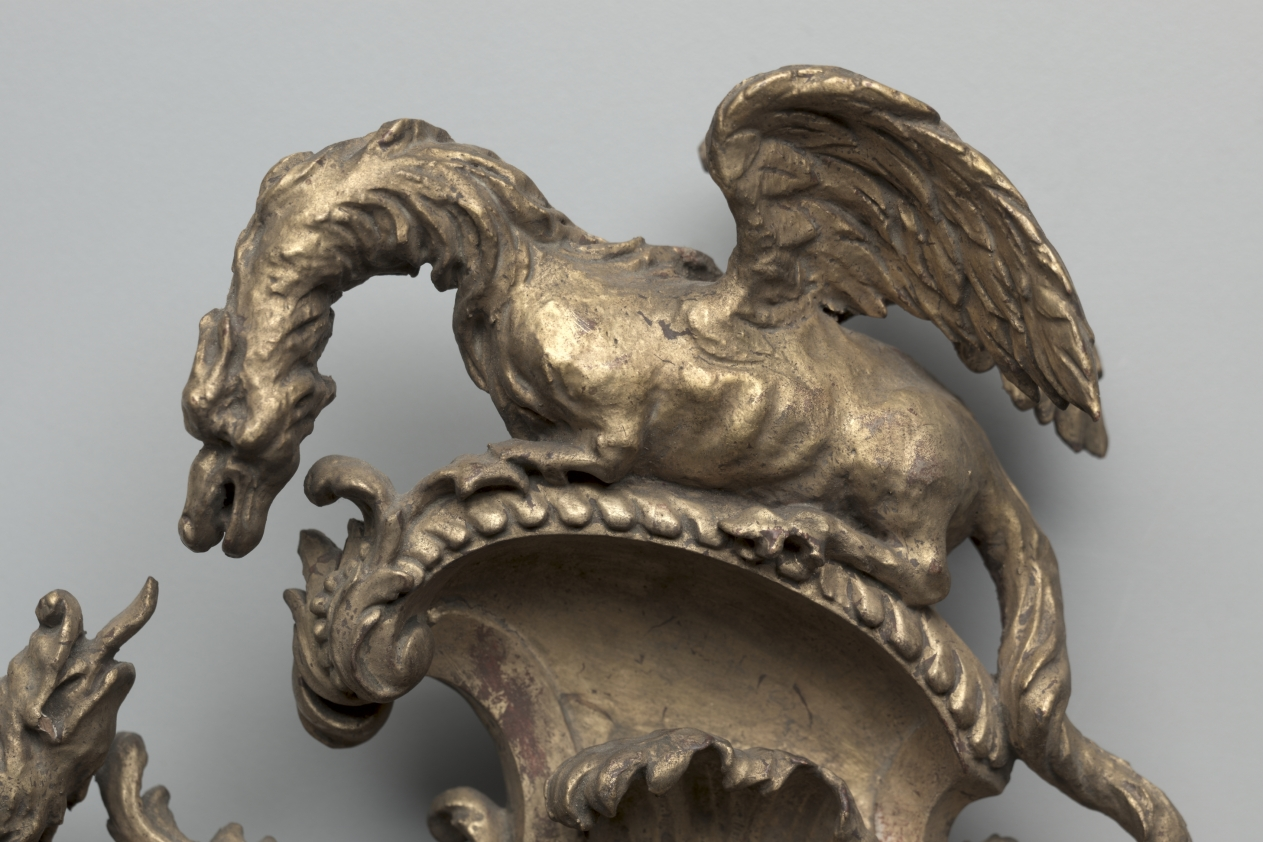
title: Wall Decoration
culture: France, Regency Period, 18th Century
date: 1715–1725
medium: wood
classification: Furniture and woodwork